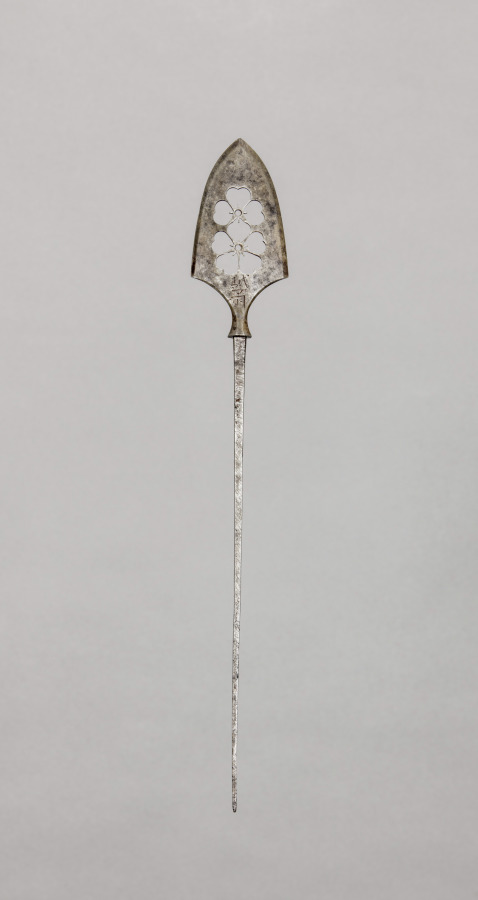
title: Arrow Point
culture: Japan, Edo period (1615–1868)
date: 1700s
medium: steel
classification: Arms and Armor